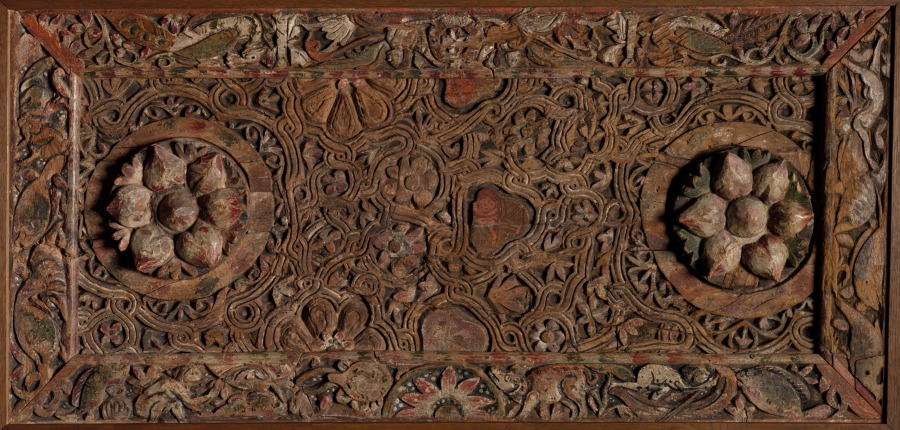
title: Ornamental Panel (from a Ceiling?)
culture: Egypt, Coptic period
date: 500s (frame) and 700s (central panel)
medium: wood with paint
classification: Furniture and woodwork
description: This wooden panel and its frame come from different locations. The four narrow panels forming the outer frame are stylistically datable to the 500s. The large central rectangular panel might date to the 700s. It is most likely a carved ceiling, but its architectural context is unknown. Both panel and frame have been cut down and joined together at some point in their history under unknown circumstances. The decorative program of the main panel features two large rosettes surrounded by florets, leaves, and fruit. The outer frame features two flying angels holding a wreath, a peacock, an octopus, a seated fisherman who holds a long line with a fish attached, and a swimming boy with a dolphin. The vocabulary of the frame is dominated by water life, particularly of the Nile and its banks. Though separated from its original place and altered, this important object provides a welcome glimpse of an architectural interior from early Christian Egypt.